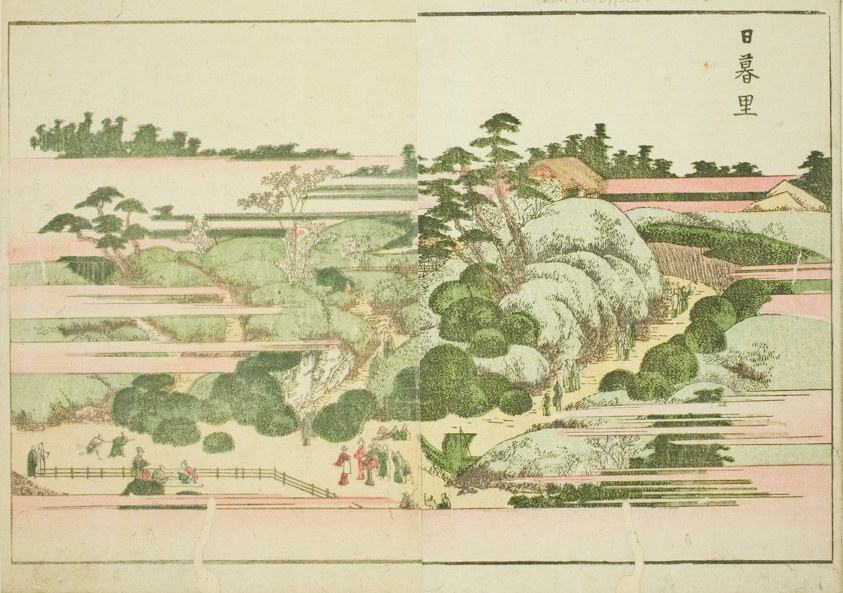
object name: Print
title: Nippori, from the illustrated book "Picture Book of Amusements of the East (Ehon Azuma asobi)"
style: Japanese (culture or style)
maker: Katsushika Hokusai 葛飾 北斎; Japanese, 1760-1849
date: c. 1802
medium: Color woodblock print; double-page illustration from book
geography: Japan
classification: woodblock print; print; asian art